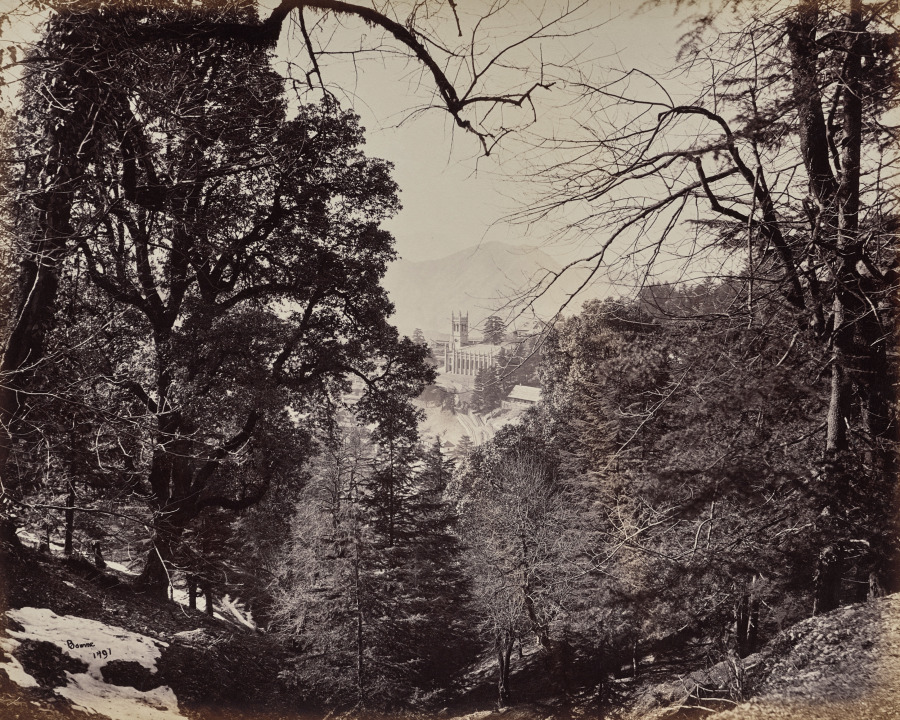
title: Shimla. The Church Through the Trees, from Jakko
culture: England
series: Photographs of Northern India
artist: Samuel Bourne (British, 1834–1912)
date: 1863–70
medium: albumen print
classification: Photograph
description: The 50 images in this album, all taken in the 1860s, move from the hill towns of the Himalayas down to cities including Lahore (now in Pakistan), Delhi, Lucknow, Agra, Benares (now Varansi), and Calcutta (now Kolkata). Architectural studies of major monuments offer valuable historical records of what sites such as the Taj Mahal and the imperial mosque of the Mughal emperors in Delhi looked like before 20th-century restorations.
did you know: Samuel Bourne, the author of most the images in this album, was a banker in England before he moved to India to become a professional photographer.